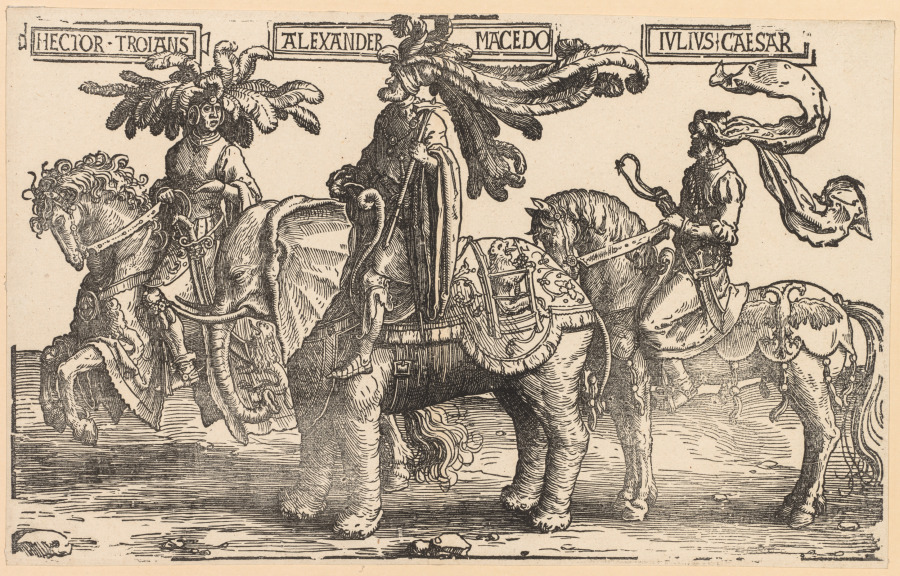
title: The Nine Heroes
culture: Netherlands, 16th century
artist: Lucas van Leyden (Netherlandish, 1494–about 1533)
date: 1515–1517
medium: woodcut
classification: Print